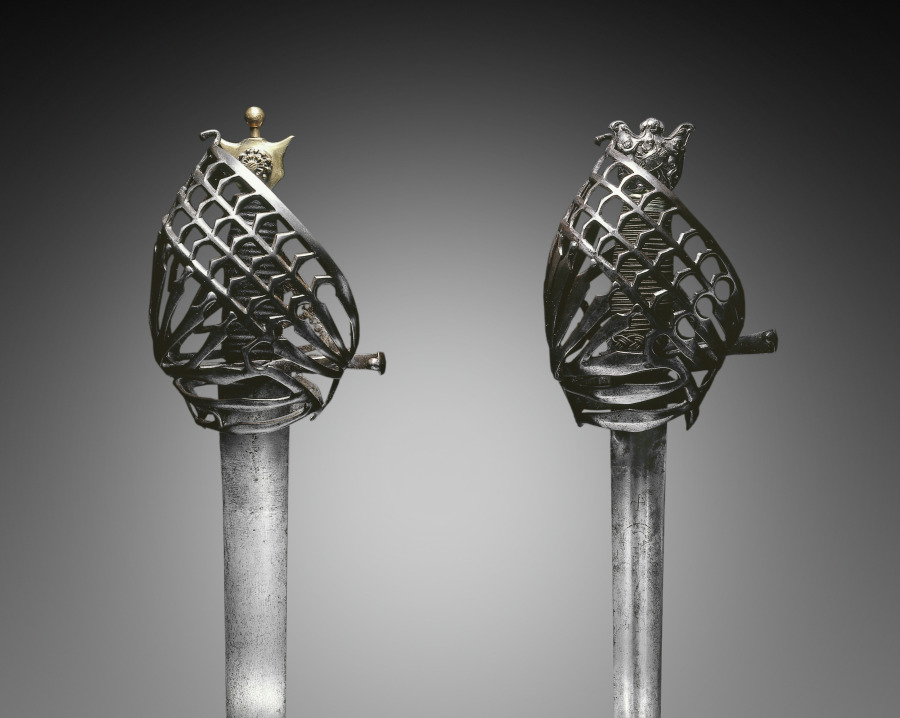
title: Schiavona Broadsword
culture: Italy, Venice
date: early 1700s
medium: steel and silver wire grip. silver pommel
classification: Arms and Armor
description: The schiavona-type broadsword features a complex barred guard that slopes forward. Its name derives from the Italian word for "Slavonic" and refers to the Slavonian corps who served as bodyguards to the Doge of Venice until the end of the Venetian Republic in 1797. Such swords were popular mainly with the Venetians.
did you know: A broadsword is a sword with a straight, wide, two-edged blade and was used by European heavy cavalry through the 1800s.